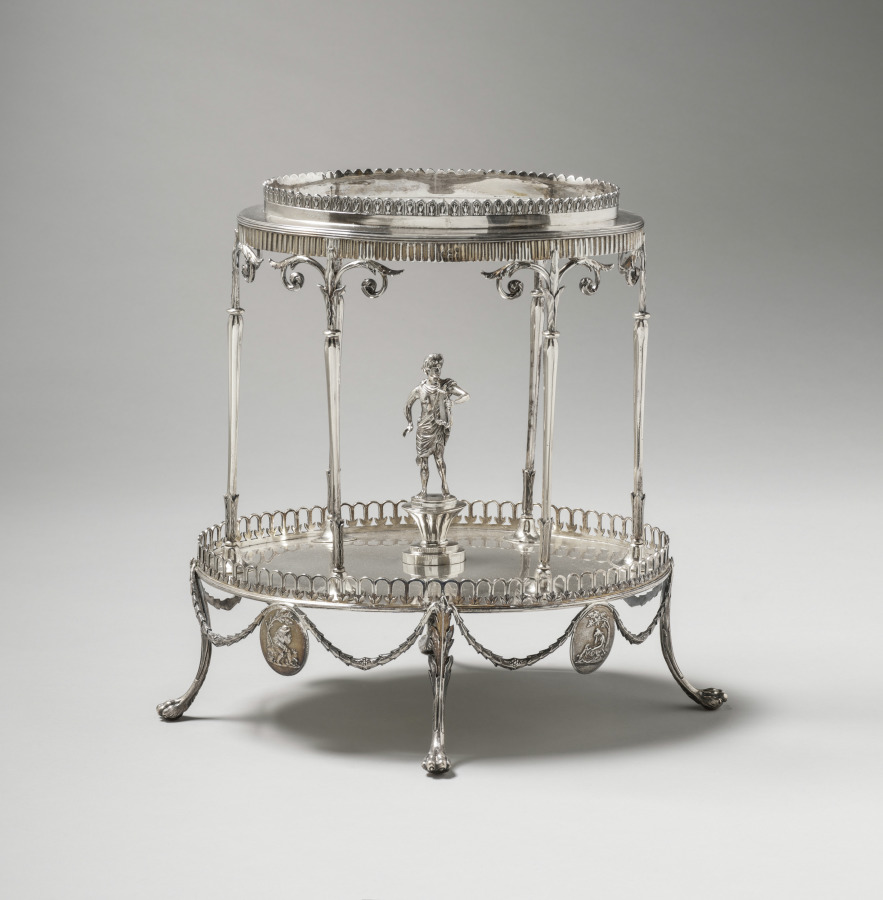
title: Centerpiece (metal stand)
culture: England, 18th century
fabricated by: William Pitts (British)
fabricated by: Joseph Preedy (British)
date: 1792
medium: silver and glass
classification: Silver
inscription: engraved: arms and crest of Bell Coat of arms with Bell impaling Brandling on flat platform.